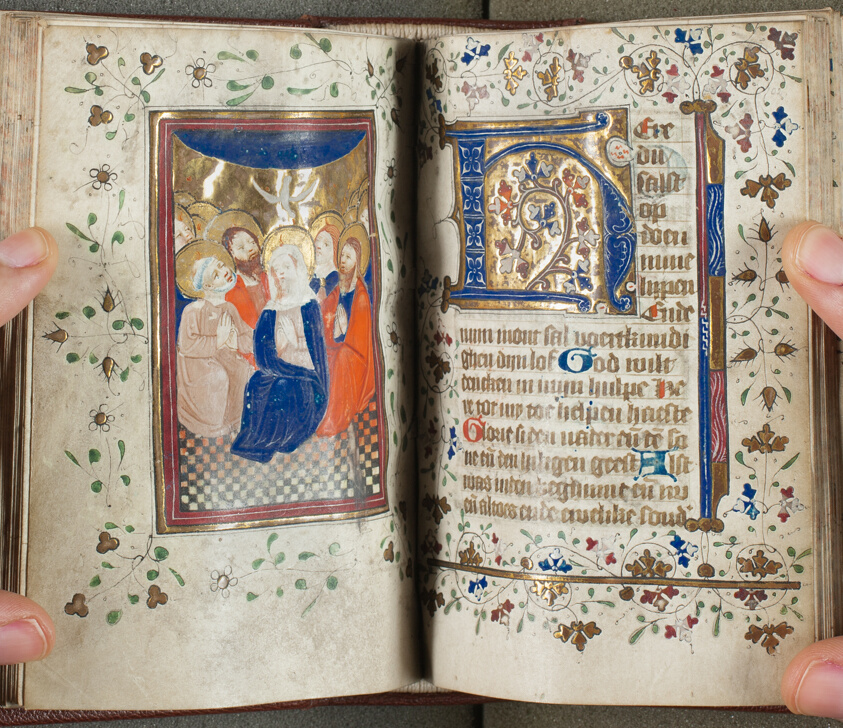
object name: Book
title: Book of Hours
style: medieval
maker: Netherlandish (Utrecht); 15th century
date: c. 1420 (20th century binding)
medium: Manuscript with 259 folios, six miniatures and other decorations in tempera and gold leaf, with Dutch inscriptions in littera textualis, in blackish brown ink, ruled in graphite, on parchment, in a modern binding of brown morocco over wooden boards, with stamped designs on the endbands, and with machine cut edges, marbled in red and blue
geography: Netherlands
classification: book; manuscript; prints and drawing